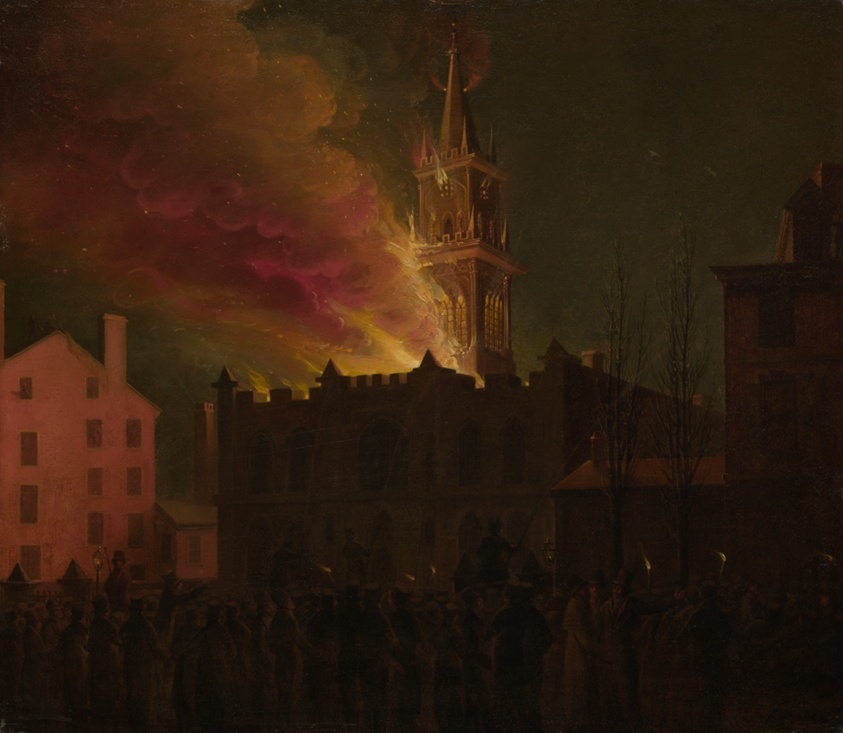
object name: Painting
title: Conflagration of the Masonic Hall, Chestnut Street, Philadelphia, Pennsylvania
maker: Samuel Jones; American, 19th century; Possibly John Lewis Krimmel; American, born Germany, 1786–1821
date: 1819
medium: Oil on mahogany panel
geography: Philadelphia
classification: painting; american arts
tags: architecture